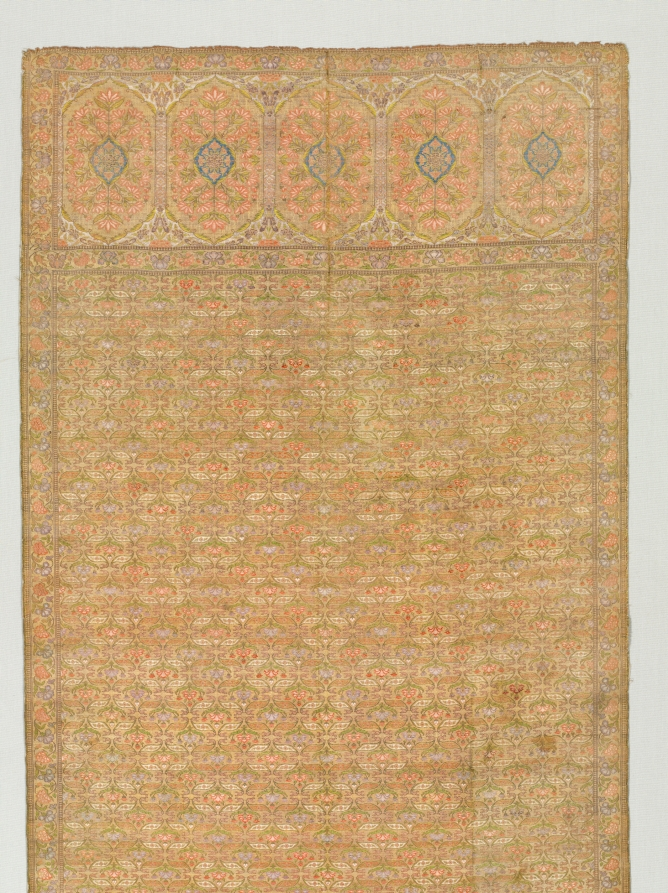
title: Sash with floral field and end panels on a gold ground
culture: Iran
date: 1700s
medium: taqueté with discontinuous wefts: silk, gilt- and silver-metal thread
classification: Textile